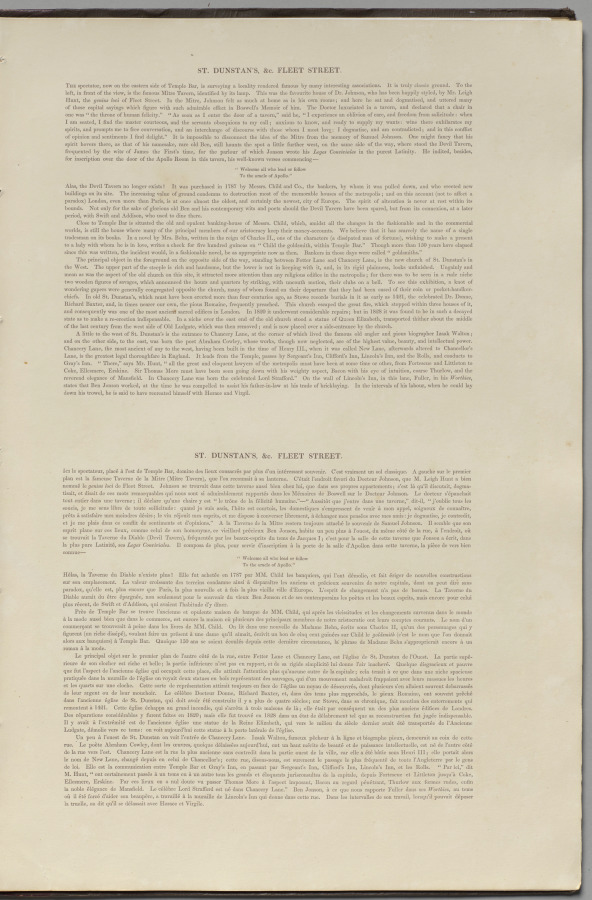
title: London As It Is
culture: England, 19th century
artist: Thomas Shotter Boys (British, 1803–1874)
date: 1842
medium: lithograph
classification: Bound Volume